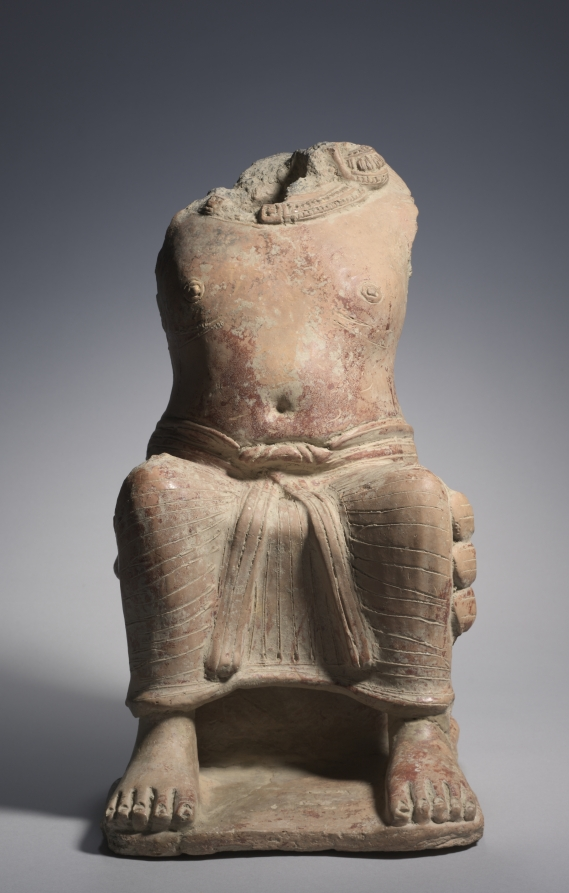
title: Seated Yaksha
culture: Northern India, Uttar Pradesh, probably Kaushambi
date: 300s CE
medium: terracotta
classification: Sculpture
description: The power and frontality of this figure, whose bare feet are planted firmly on the ground, along with the corpulence of his protruding belly, suggest that the image may represent Kubera, or a yaksha worshiped for wealth and prosperity. Terracottas of large size like this one were usually modeled freely and incised with a wire tool.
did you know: The figure wears a heavy, short necklace and originally wore earrings, of which only the left one remains.